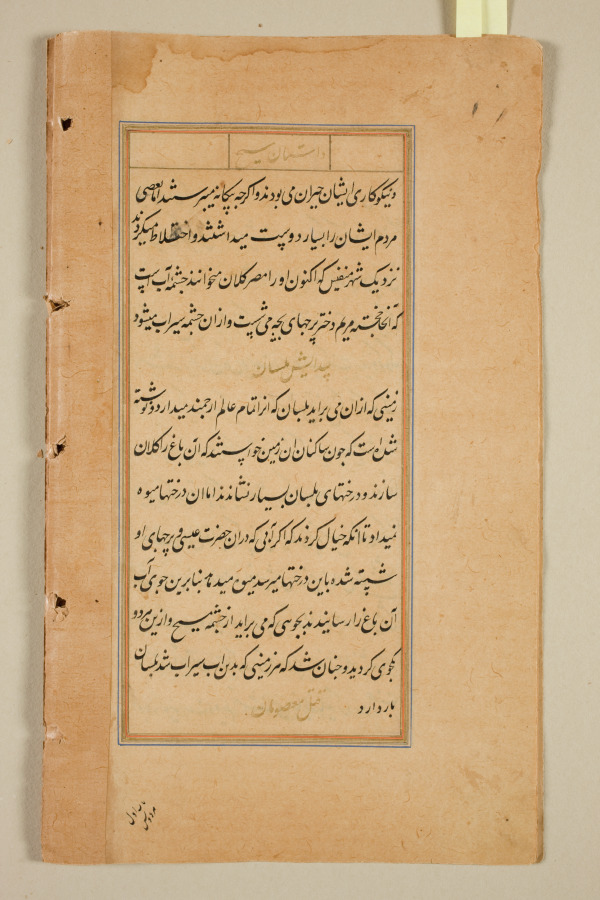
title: Text page from a Mirror of Holiness (Mir’at al-quds) of Father Jerome Xavier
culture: Mughal India, Allahabad, made for Prince Salim (1569–1627)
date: 1602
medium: Ink and gold on paper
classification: Manuscript